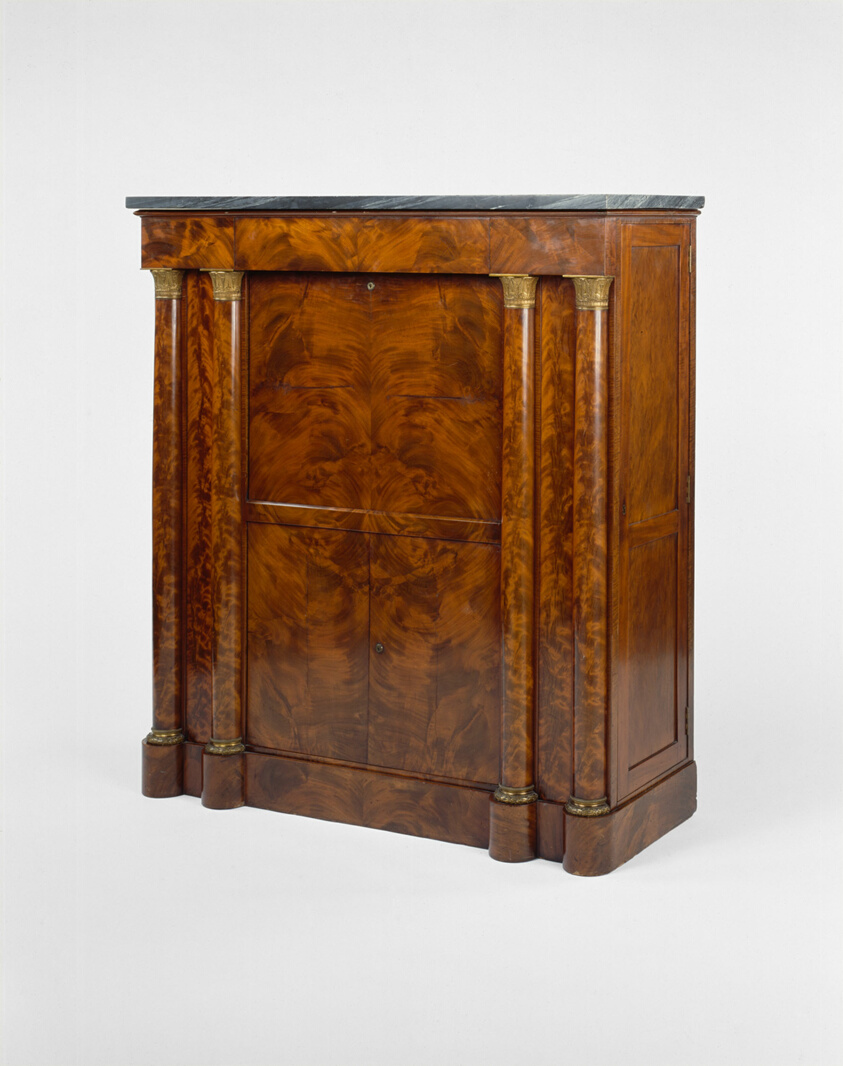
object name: Furniture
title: Secrétaire à abattant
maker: Artist unknown (American, 19th century); Boston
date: 1820–25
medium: Mahogany, mahogany veneer, white pine, and popular, with black marble, ormolu, and brass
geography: Boston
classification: table; furniture; american decorative arts; american arts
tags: furniture